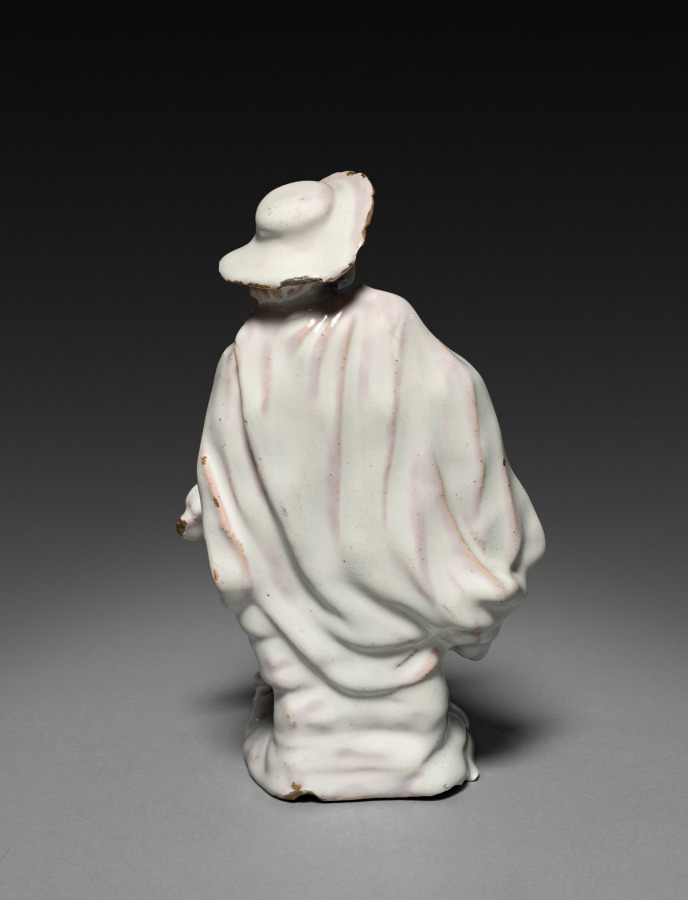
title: Seated Musician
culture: France, Strasbourg, 18th century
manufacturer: Strasbourg Factory (France)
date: c. 1740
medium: faience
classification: Ceramic